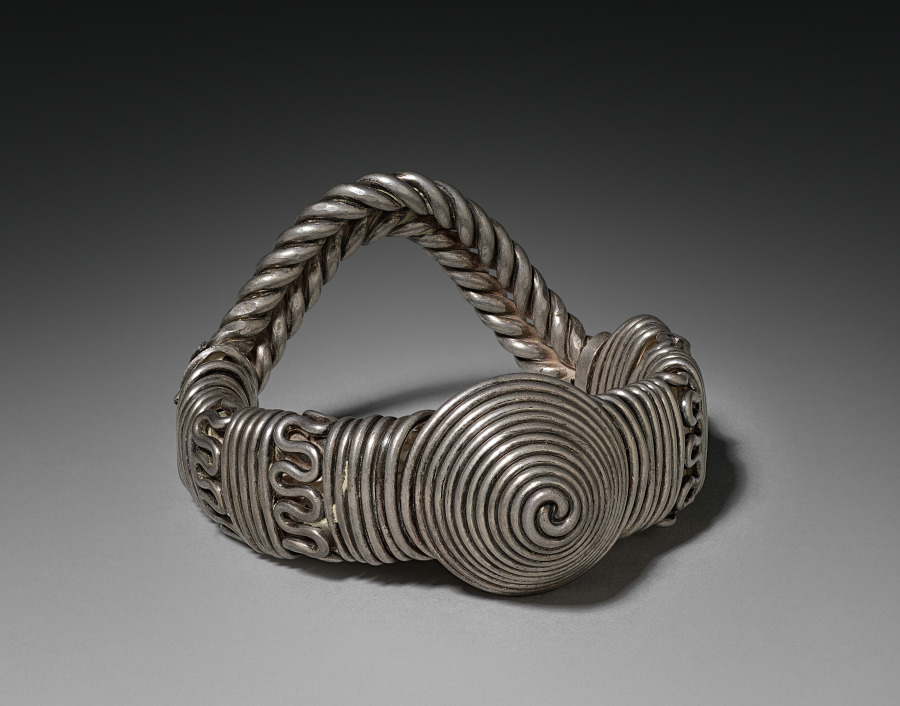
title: Armlet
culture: India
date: 1800s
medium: silver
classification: Jewelry